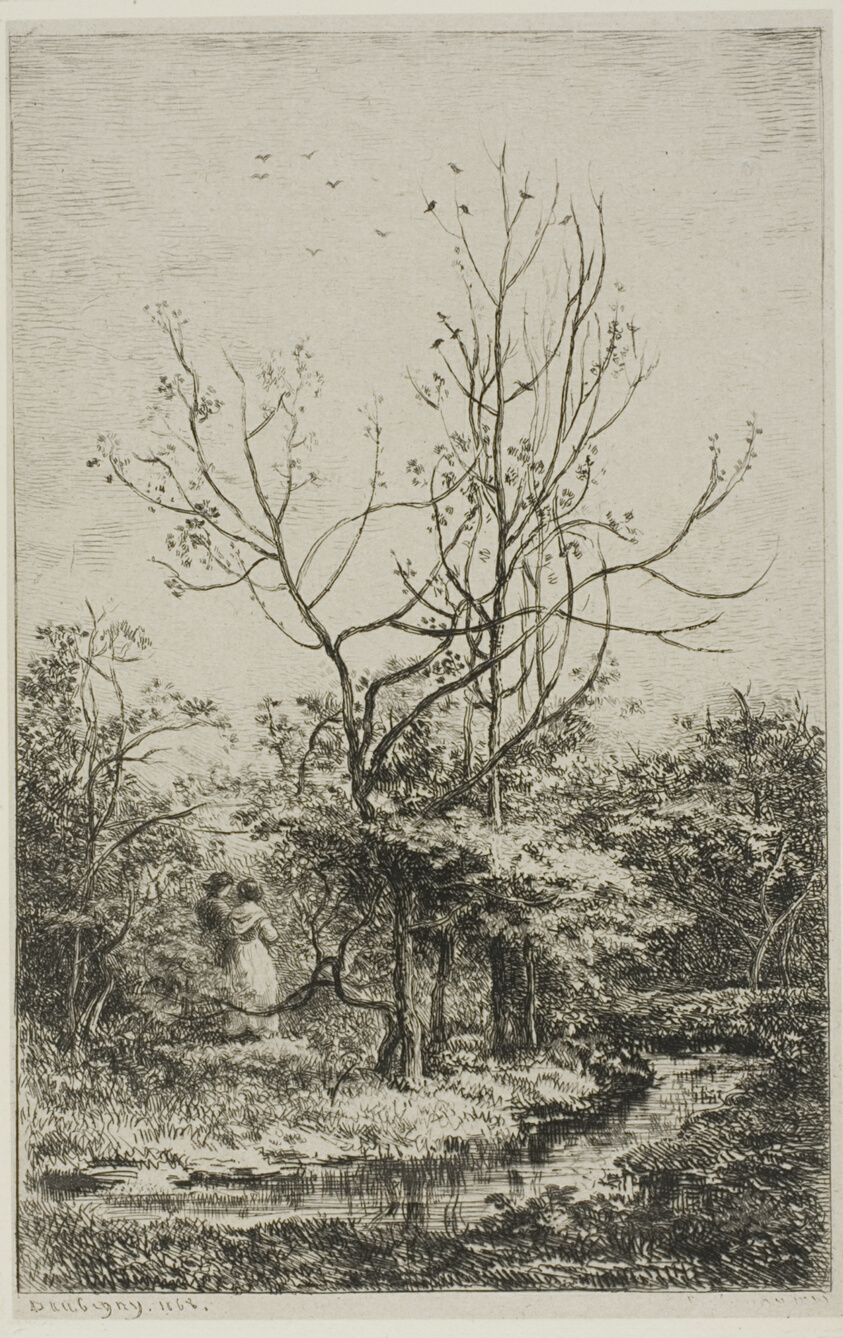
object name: Print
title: The Orchard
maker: Charles François Daubigny (French, 1817-1878)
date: 1868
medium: Etching and drypoint on light gray chine laid down on ivory wove paper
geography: France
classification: etching; print; prints and drawing